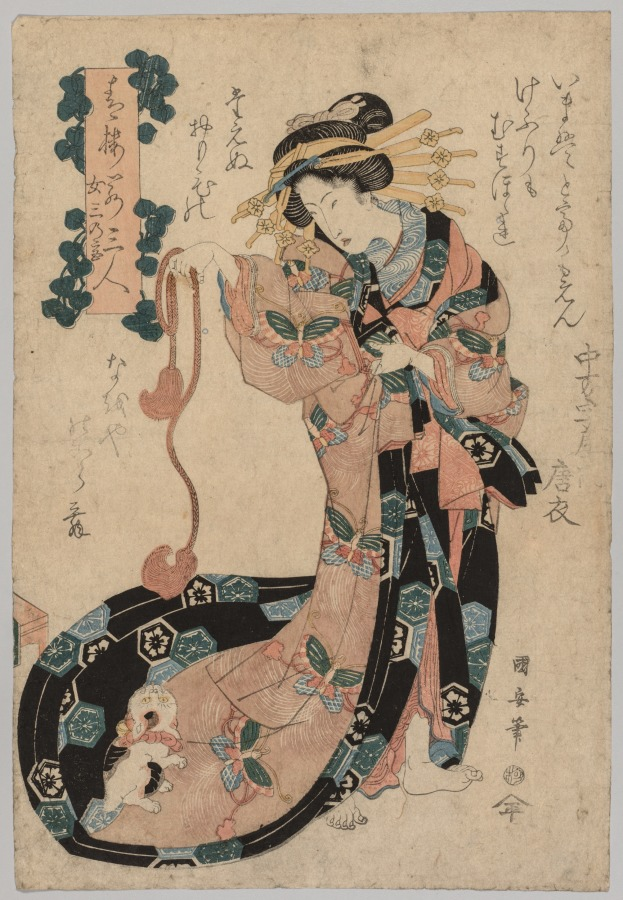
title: Courtesan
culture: Japan, Edo period (1615–1868)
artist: Utagawa Kuniyasu (Japanese, 1794–1834)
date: 1794–1834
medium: color woodblock print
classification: Print